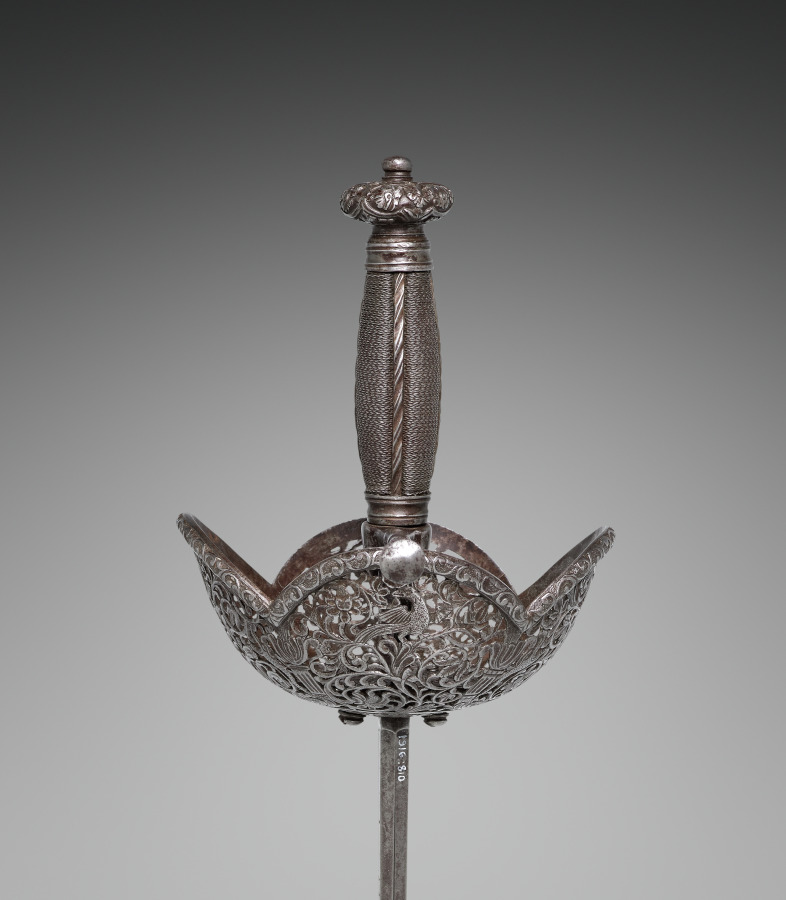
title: Cup-Hilted Rapier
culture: Spain, Toledo, 17th century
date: c. 1650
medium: Pierced and chiseled steel;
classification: Arms and Armor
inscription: PEDRO DEL MONTE/ IN TOLEDO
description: For parrying, rapiers were often made with accompanying daggers as a matched set. The aristocracy's taste for rich and intricate styles of decoration led to extravagant gilding, chiseling, piercing, enameling, and silvering. The more costly or unusual these weapons appeared, the more they were desired by the clientele who commissioned them, not only for dueling but also as the ultimate accessory.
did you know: The guard is richly decorated with chiseled and pierced arabesques, an ornamental design consisting of intertwined flowing lines.